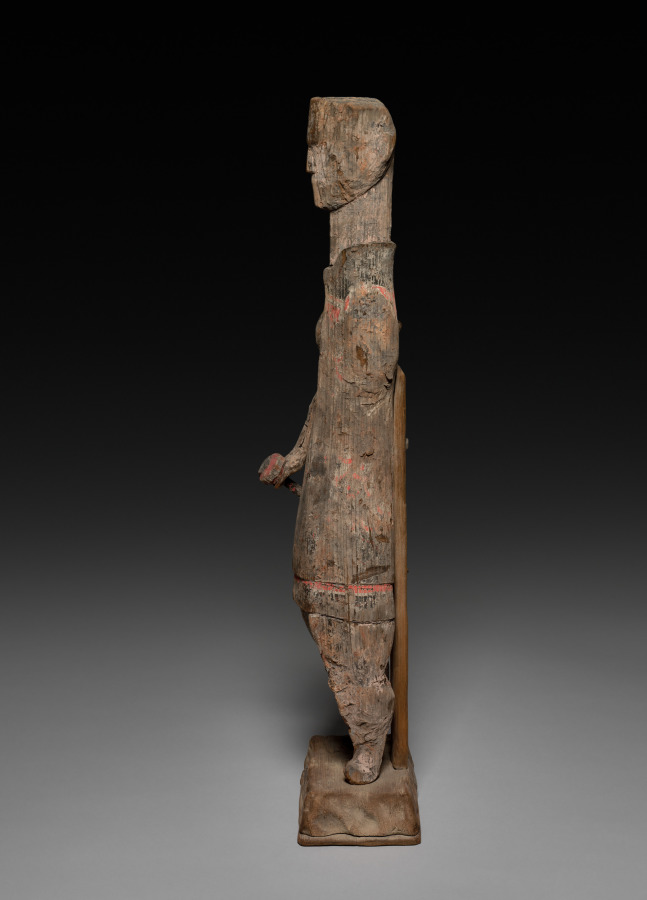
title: Figure with Sword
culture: China, Eastern Zhou dynasty (770–256 BCE), Warring States period (475–221 BCE)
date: 400–300 BCE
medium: wood with traces of polychromy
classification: Sculpture